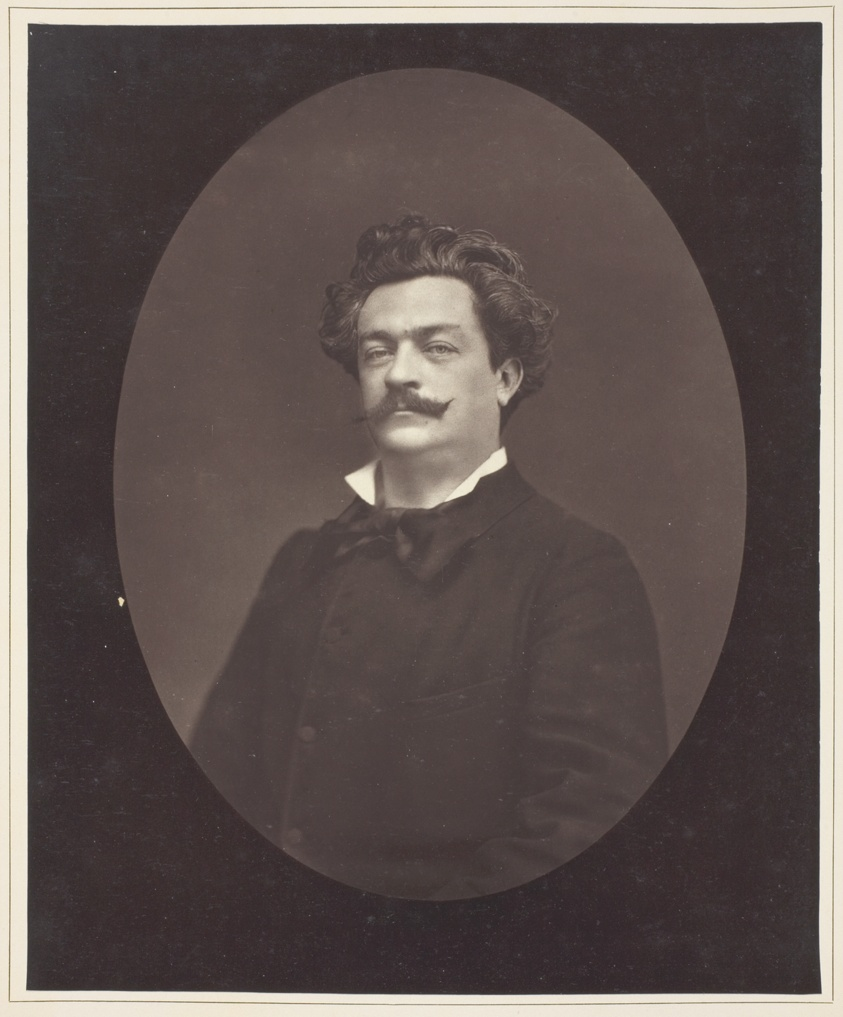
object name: Photograph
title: André Gill (French caricaturist, 1840-1885)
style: 19th century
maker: Étienne Carjat; French, 1828–1906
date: c. 1876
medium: Woodburytype, from the periodical “Galerie Contemporaine Littéraire, Artistique” (1878), volume 6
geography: France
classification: woodburytype; photomechanical process; photography; photograph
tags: Collected by Hugh Edwards, Paris, Contemporaine Littéraire